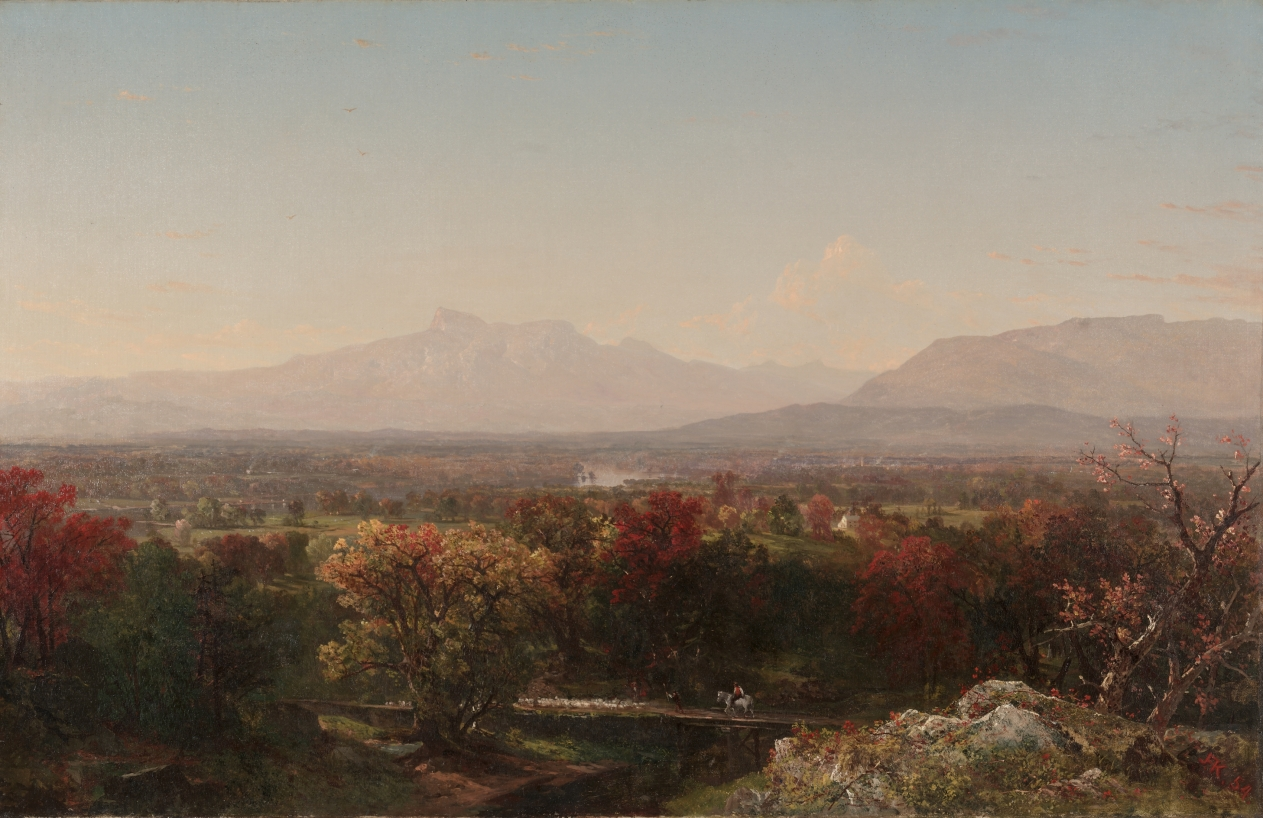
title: An October Day in the White Mountains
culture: America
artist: John Frederick Kensett (American, 1816–1872)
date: 1854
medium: oil on canvas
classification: Painting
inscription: Signed lower right: "JF.K. 54 [JF in monogram]"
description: After railroad service to the area was improved in the early 1850s, the White Mountains in New Hampshire became a favored destination for tourists and artists seeking to commune with nature. New York-based Kensett painted several views, including this distant rendering across the Saco River of Mount Chocorua, one of the most distinctive peaks in the region.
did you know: Kensett was a selfless individual known for his charity work and helping fellow artists.